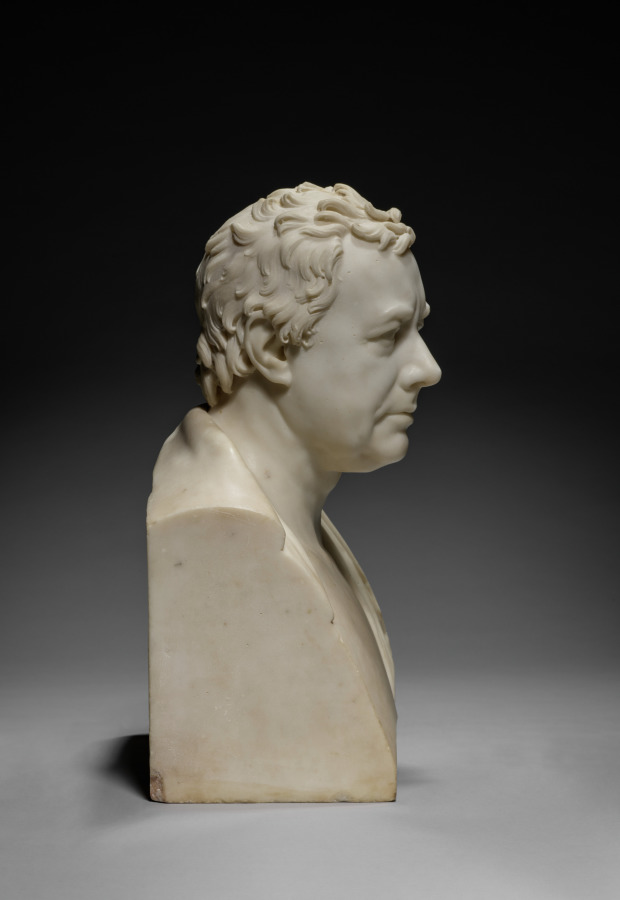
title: Sir H. C. Englefield, Bart.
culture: England, 19th century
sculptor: Francis Legatt Chantrey (British, 1781–1841)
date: 1818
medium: marble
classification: Sculpture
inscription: inscribed left side: Chantrey/Sculptor/1818; rear: Sir H. C. Englefield, Bart.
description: To modern eyes, a bare-chested portrait of a man in his mid-60s might seem undignified. However, it was fashionable for gentlemen of Englefield’s generation to be portrayed in this manner, deliberately referencing the antique sculptures of Roman statesmen they admired. As a Catholic, Englefield was barred from taking part in politics in England; however, he was a member of several clubs devoted to the amateur study of art, science, and history. Among these were the Society of Dilettanti, which championed the works of antiquity and promoted the creation of modern art in the same spirit—like this marble bust by celebrated sculptor Francis Legatt Chantrey.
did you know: Initially, Chantrey tried to establish himself as a portrait painter. After 1805, he painted only on occasion and from 1811–20, he became the leading portrait sculptor in Regency Era Great Britain.